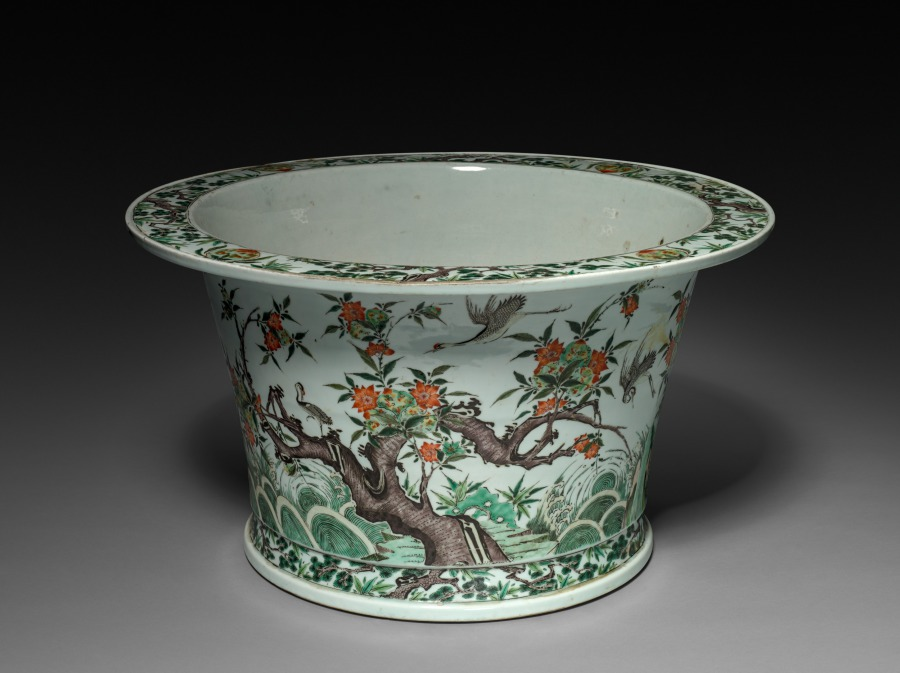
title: Jardiniere with Cranes and Peaches over Waves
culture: China, Jiangxi province, Jingdezhen kilns, Qing dynasty (1644-1911), Kangxi reign (1661-1722)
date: 1662–1722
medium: porcelain with famille verte overglaze enamel decoration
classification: Ceramic